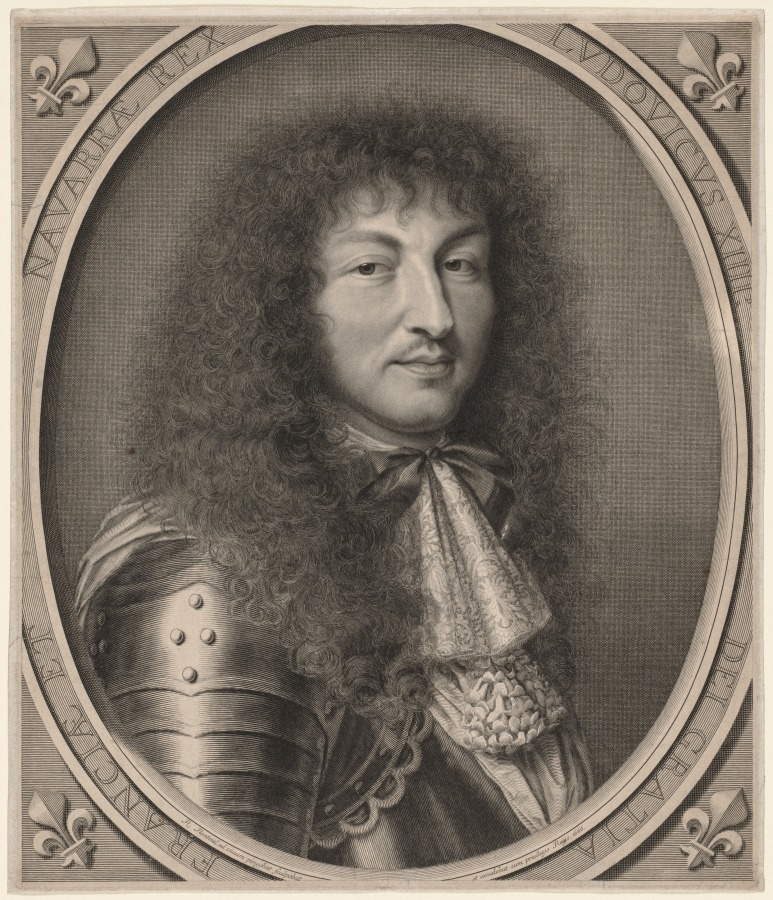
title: Louis XIV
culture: France, 17th century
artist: Robert Nanteuil (French, 1623–1678)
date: 1666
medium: engraving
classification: Print